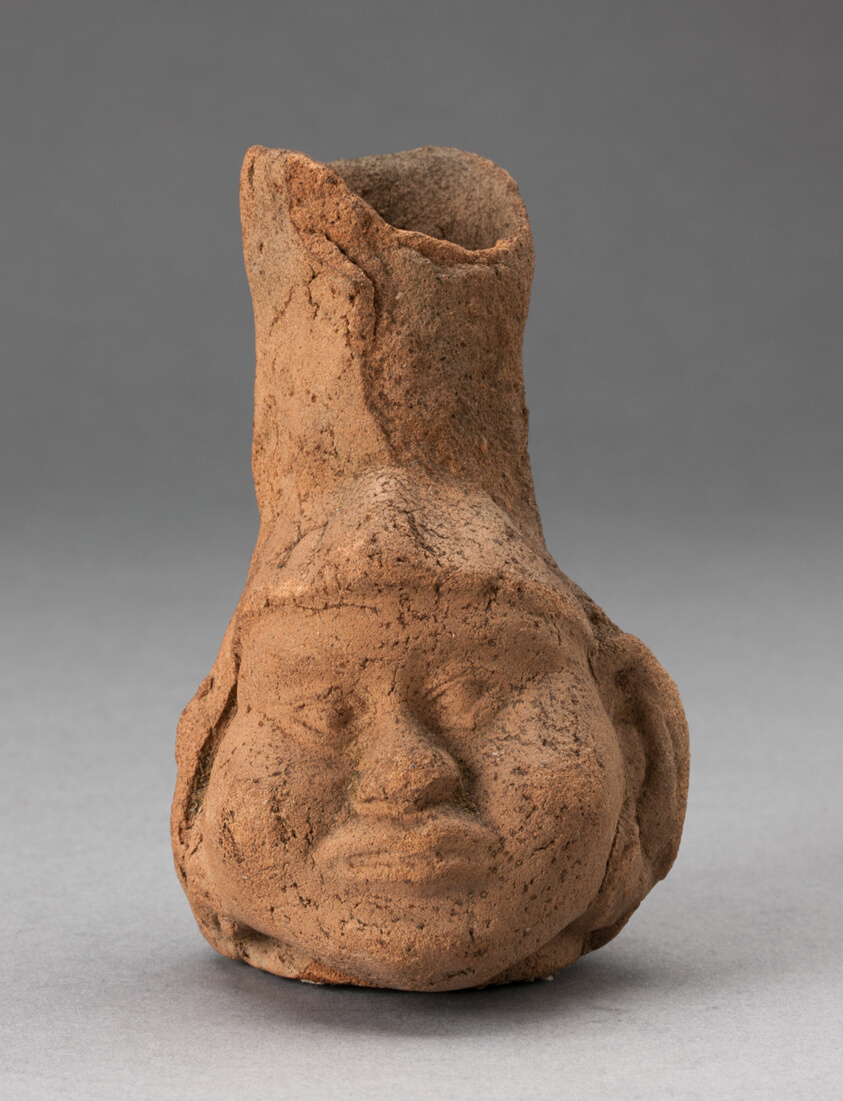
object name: Vessel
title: Heavily Eroded Miniature Jar in Form of a Human Head with Large Cheeks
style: moche, mochica, early intermediate period, Pre-Columbian, americas, Arts of the Americas, andean, andes, south american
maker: Moche (North coast, Peru)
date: 100 BCE–500 CE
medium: Ceramic and pigment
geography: Peruvian North Coast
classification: earthenware; ceramics; vessel; art of the americas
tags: people, portraits